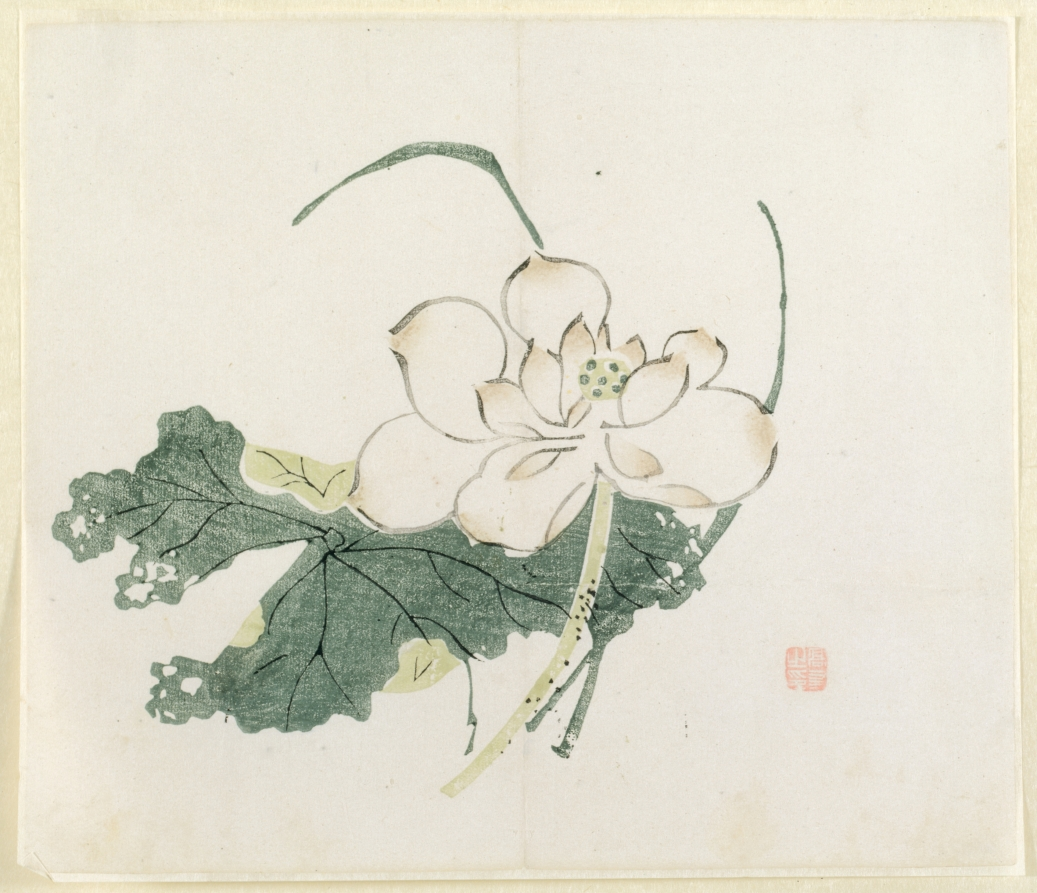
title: Lotus Blossom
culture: China, Ming dynasty (1368-1644) or later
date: 1368–1644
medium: color woodblock print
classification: Print